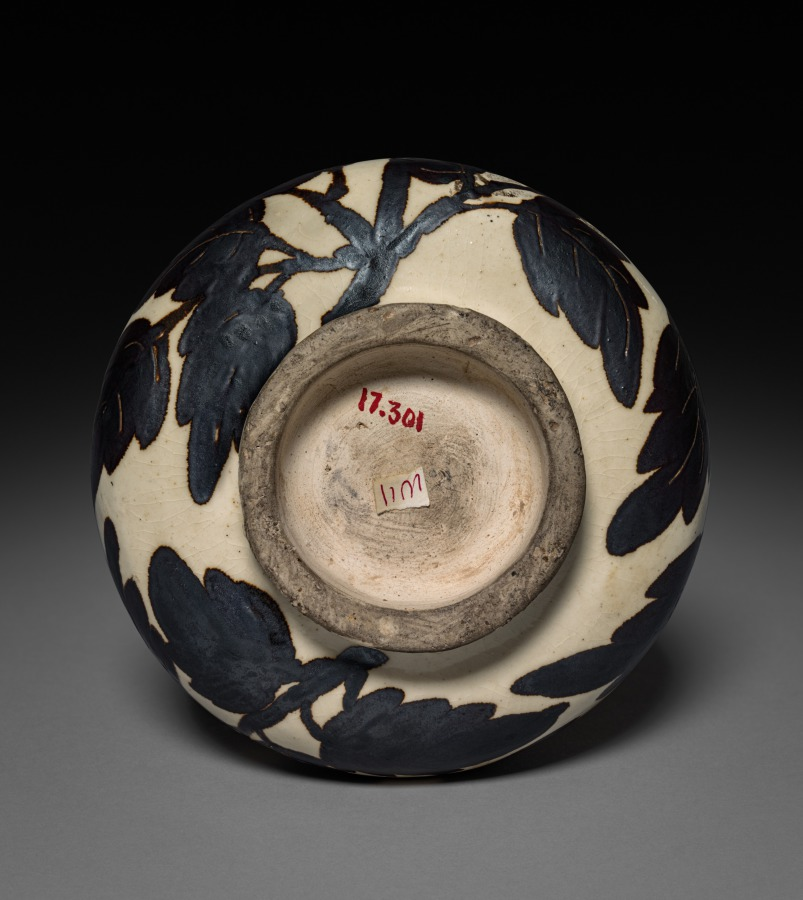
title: Gourd-shaped Vase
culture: China, Ming dynasty (1368–1644)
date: 1368–1644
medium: porcelain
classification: Ceramic